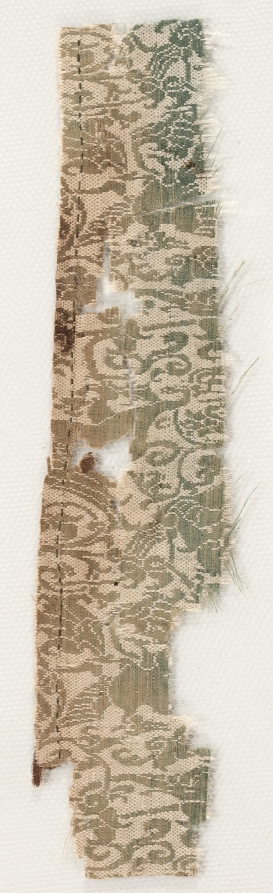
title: Fragment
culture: Egypt, Ayyubid, 12th century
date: 1100s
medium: tabby with supplementary weft; silk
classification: Textile